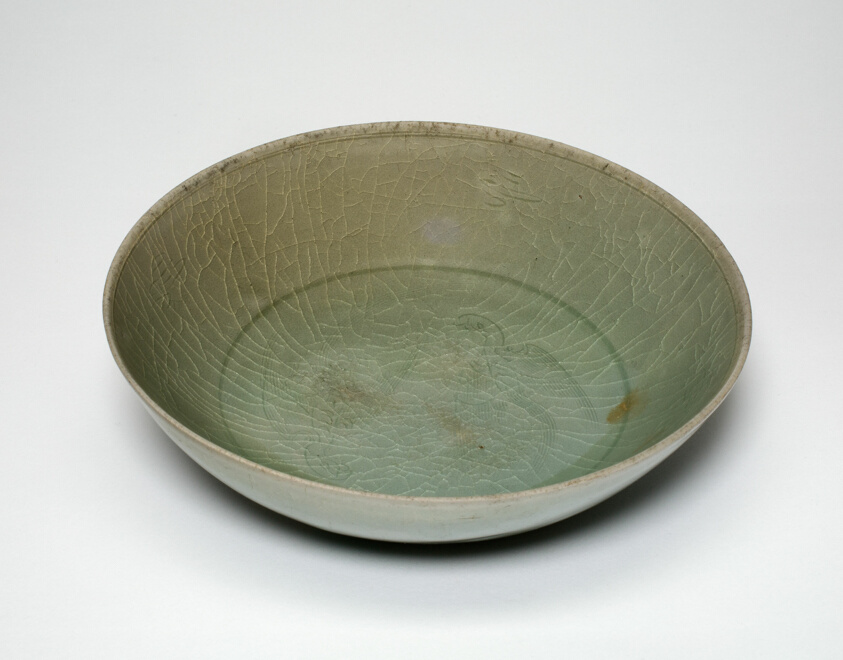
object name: Vessel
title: Bowl with Flying Phoenixes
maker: Korea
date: Goryeo dynasty (918–1392), early 12th century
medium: Celadon-glazed stoneware with underglaze incised decoration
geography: Korea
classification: stoneware; asian art; ceramics; vessel